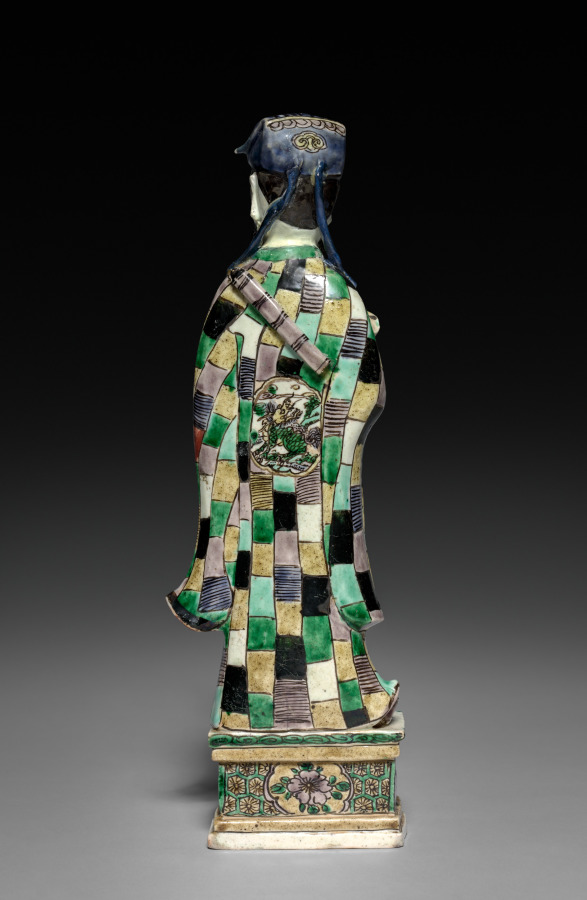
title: Daoist Immortal Zhongli Quan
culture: China, Jiangxi province, Jingdezhen kilns, Qing dynasty (1644-1911), Kangxi reign (1662-1722)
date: 1662–1722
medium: porcelain with famille verte overglaze enamel decoration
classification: Ceramic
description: This porcelain figure represents Zhongli Quan as a scholar. He is wearing a scholar’s hat and carries a scroll on his back. He holds a fan that, according to legend, could bring the dead to life. Thus, he also bears the auspicious meaning of longevity. On his bare belly, the potter painted a qilin, a mythical auspicious creature that turns his head to the sun. The same design in different colors also decorates his back.